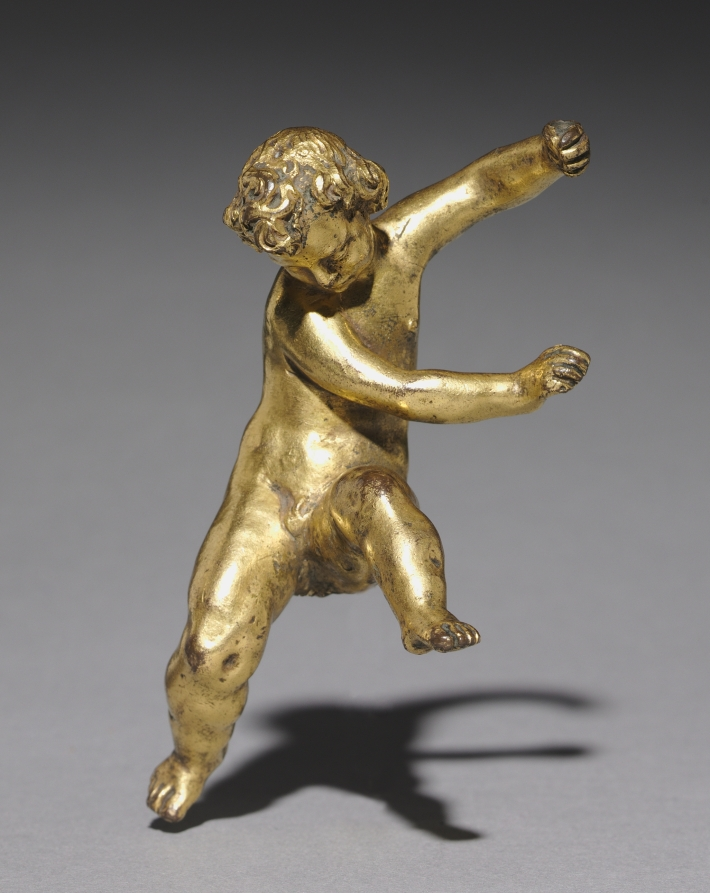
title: Putto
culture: Italy, Rome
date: late 1500s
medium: gilt bronze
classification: Sculpture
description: These gilt bronze putti, or figures of plump male children in the nude, are near mirror images of one another. Both are seated, with their arms flung to the side. Minimal detailing exists in the hands and feet, with the fingers and toes signified only by simple line indentations. The function and original placement of the putti is uncertain, but their posture and the placement of their hands suggest that originally they may have been placed in a larger statue group, perhaps holding either side of a banner, or even a piece of furniture. A will drawn up by Guglielmo della Porta in 1558 mentions the existence of bronze Passion scenes and crucifixes, suggesting that the artist may have created other small bronze groups as well. John Pope-Hennessey attributed these works to della Porta based on their similarity to the figures of Apollo and Artemis in Latona and her Children (Victoria and Albert Museum, London) and the monumental putti in his Tomb of Cardinal Paolo Cesi in Santa Maria Maggiore in Rome, although more recent research points away from della Porta as the maker. Ana Dieglio 2009